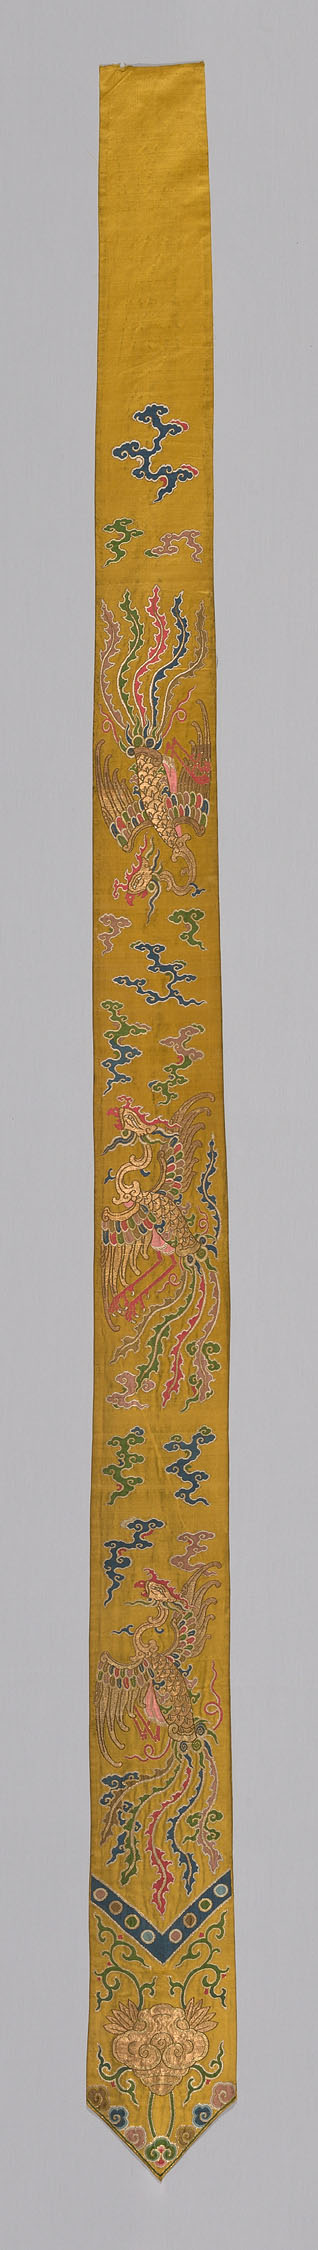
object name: Textile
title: Pendents (For Bed Curtains)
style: qing, Chinese (culture or style), East Asian, asian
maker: Manchu (China)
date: Qing dynasty (1644–1911), 1736/95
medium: Silk, gold-leaf-over-lacquered-paper strips, and gold-leaf-over-lacquered-paper-strip-wrapped silk, warp-float faced 7:1 satin weave with supplementary brocading wefts bound in weft-float faced 1:3 'S' twill interlacings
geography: China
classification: textile; pendant (jewelry); weaving